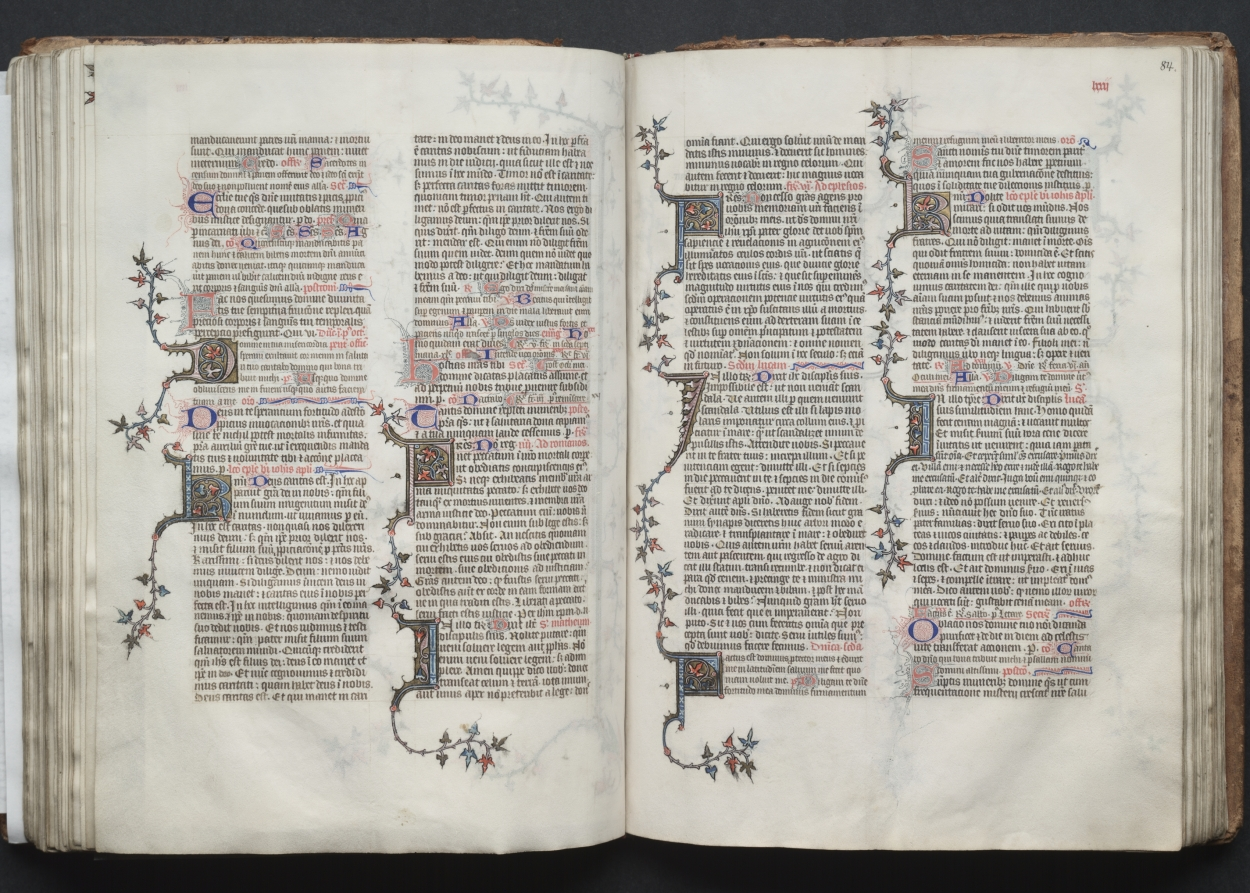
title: The Gotha Missal: Fol. 84r, Text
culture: France, Paris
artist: Master of the Boqueteaux (French)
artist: and Workshop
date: c. 1375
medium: ink, tempera, and gold on vellum; blind-tooled leather binding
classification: Bound Volume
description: The style and quality of this manuscript's decoration is typical of deluxe Parisian books made for aristocratic or royal patrons. Most of the book's decoration appears to be the work of the Master of the Boqueteaux, an artist active at the court of King Charles V (died 1380). His style was apparently shared by a number of book illuminators working in and around Paris. It is very possible that the Gotha Missal belonged to Charles V, but is not provable because the manuscript has no royal portraits and lacks a colophon. Given the book's magnificent decoration, however, it would seem that it was produced for a Valois prince, if not for the king himself. The manuscript receives its name from the German dukes of Gotha, its later owners.